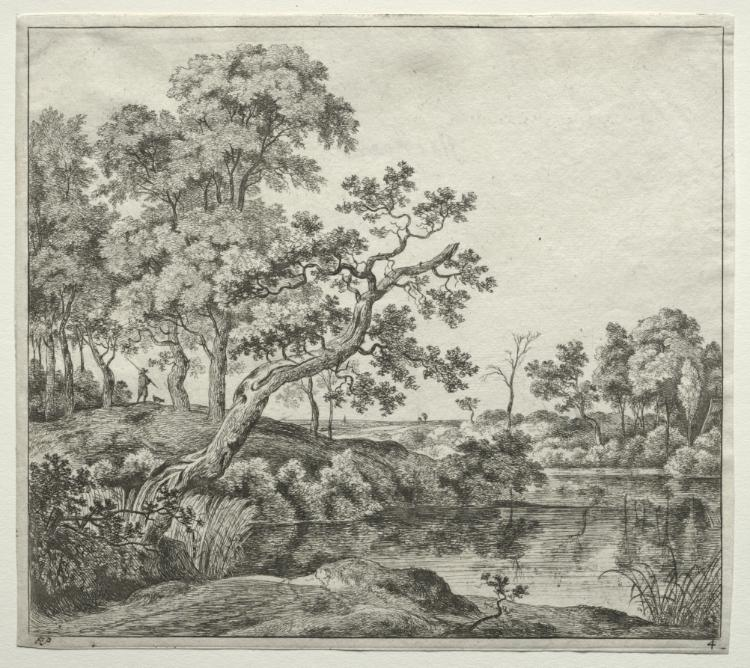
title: The Bent Tree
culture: Netherlands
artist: Jan Hackaert (Dutch, 1629–c. 1700)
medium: etching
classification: Print